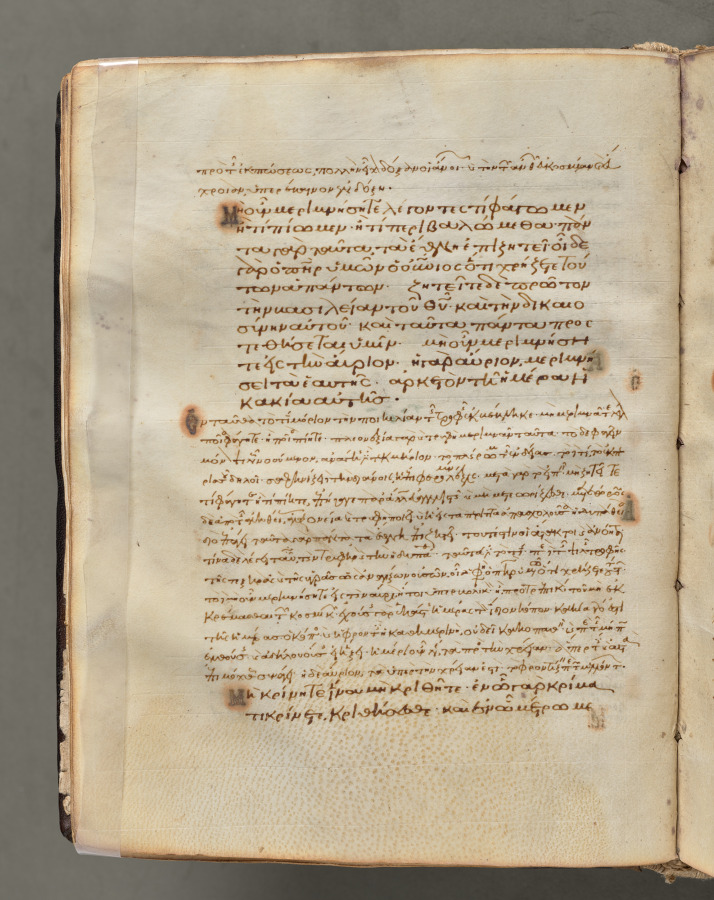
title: Text, folio 28 (verso), from a Gospel Book with Commentaries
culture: Byzantium, Constantinople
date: c. 1000–1100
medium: ink, tempera, and gold on vellum; leather binding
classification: Bound Volume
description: Each of the four gospels in this book opens on a page with brilliantly illuminated borders depicting the author of the text as well as birds—principally peacocks, symbols of the immortality of the soul—and fountains, representing the fountain of life and the salvation of the soul. This volume consists of 428 leaves with texts in Greek. Its level of sophistication suggests that it was probably written and decorated in a monastery in Constantinople.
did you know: Gospel books were carried in procession through Byzantine churches.